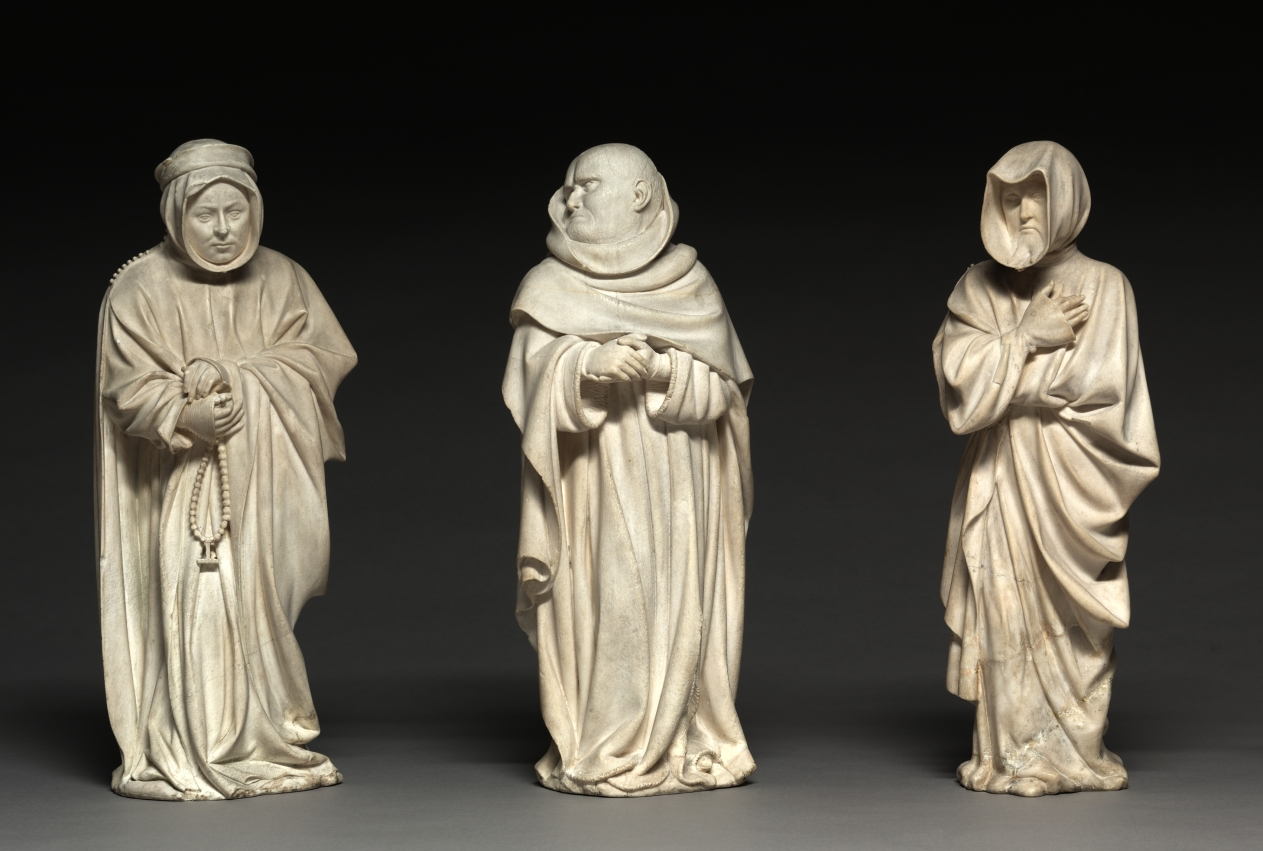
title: Mourner from the Tomb of Philip the Bold, Duke of Burgundy (1364–1404)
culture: Netherlands, active Dijon, 15th century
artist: Claus de Werve (Netherlandish, 1380–1439)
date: 1404–10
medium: vizille alabaster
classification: Sculpture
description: This figure comes from the tomb of Duke Philip the Bold from the church of Champmol near Dijon (Burgundy, France). Philip, who founded the monastery and designated it as his burial place, hired the best artists, many of whom came from the Netherlands. While the commission was given in 1381, the work was not completed until 1410, six years after the duke’s death. This mourner is unusual for the time because it is not carved as a static low relief on the pedestal of the tomb but interact with the viewers and their fellow procession members. The lifelike quality of the figure is due in large part to the alabaster. Its softness allowed artists to carve details into the material, and the transparent, milky white stone could also be polished to a high gloss.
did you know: The use of alabaster in the late Middle Ages began in the 1300s with court art in the circles of French kings, especially in the field of funerary sculpture.